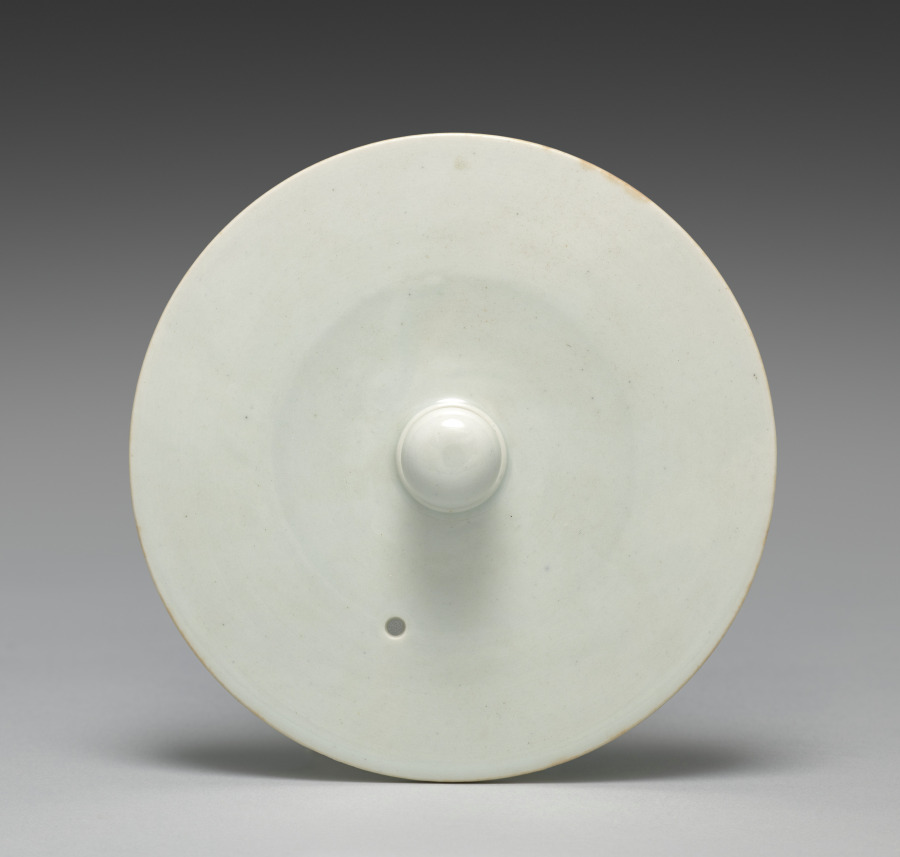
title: Lid for a Sake Pourer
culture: Japan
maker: Seifū Yohei III (Japanese, 1851–1914)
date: c. 1887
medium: Porcelain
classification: Ceramic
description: This sake pourer has a wide basin with a low foot; a generous spout open across the top half; a flat, round lid with a small knob recessed flush to the top of the container; and a tall, arched handle that meets the container where the top joins the basin at a sharp angle. This vessel is glazed but otherwise undecorated. Unlike the creamy white color of some Yohei III works, the white of this sake pourer has the bluish cast typical of porcelains produced in Kyoto.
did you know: Seifū Yohei III signed this sake pourer in underglaze blue on the base.